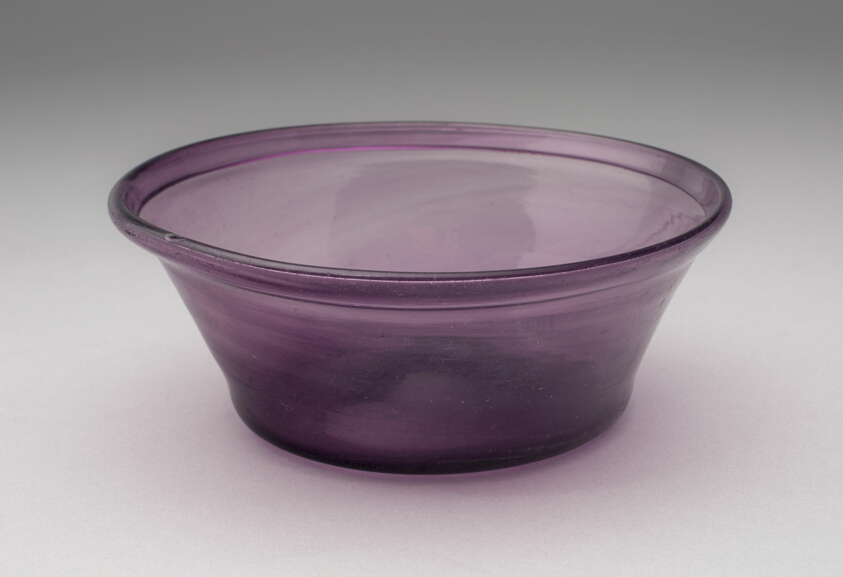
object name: Glass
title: Pan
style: Folk Art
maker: Mantua Glass Works (Manutua, Ohio, 1821–1829)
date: 1821–29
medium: Blown glass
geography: Mantua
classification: container; glass; american decorative arts; american arts; decorative arts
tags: dining, drinking